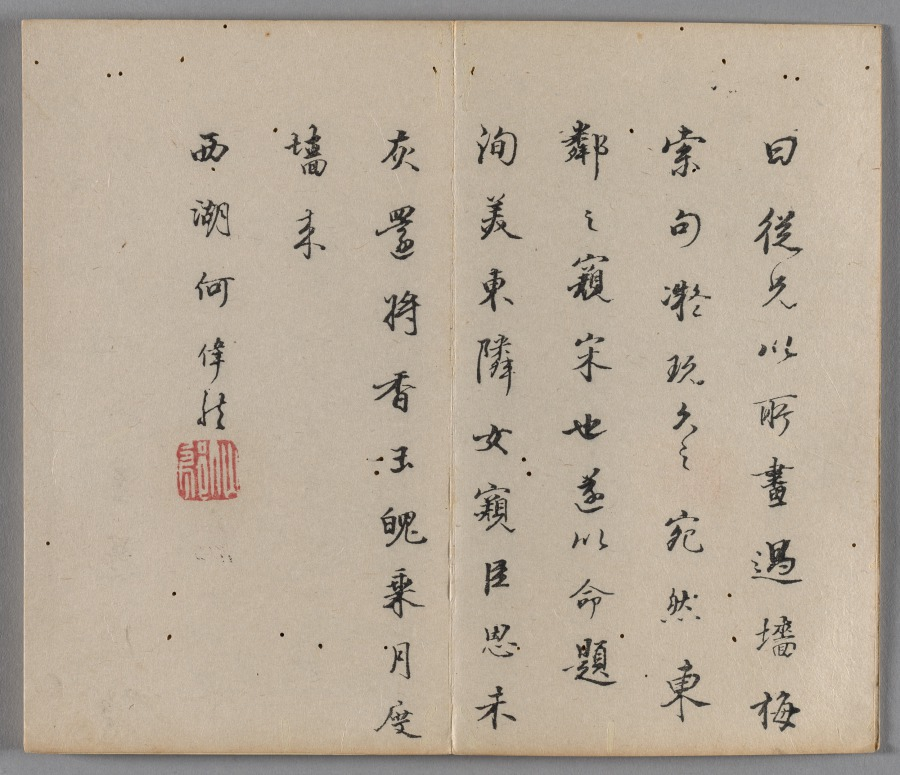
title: Ten Bamboo Studio Painting and Calligraphy Handbook (Shizhuzhai shuhua pu): Plum Blossoms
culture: China, Qing dynasty (1644-1911)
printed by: Hu Zhengyan (Chinese, c. 1584–1674)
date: 1633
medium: Woodblock-printed book; ink and colors on paper; first edition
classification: Print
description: Color printing reached a level of perfection in the early 1600s, as seen in this Ten Bamboo Studio Collection of Calligraphy and Painting and the Mustard Seed Garden Manual of Painting (printed 1679 and 1701). The painterly quality, precision in registering (aligning) the woodblocks, and harmonious colors made them the most successful color print editions in Chinese history. Both editions were printed and compiled in Nanjing, spread nationwide, and had a great impact on the arts in Japan and Korea.